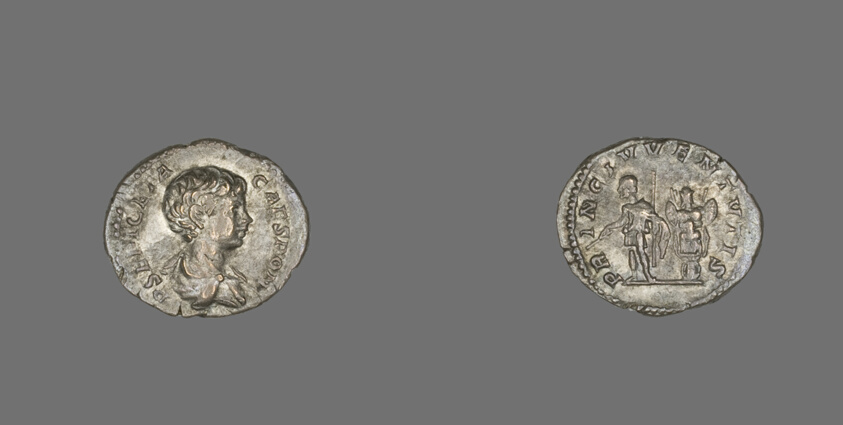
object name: Coin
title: Denarius (Coin) Portraying Emperor Geta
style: roman (ancient, style or period), ancient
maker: Roman, minted in Rome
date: 200-202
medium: Silver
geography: Roman Empire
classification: coin; ancient art; struck